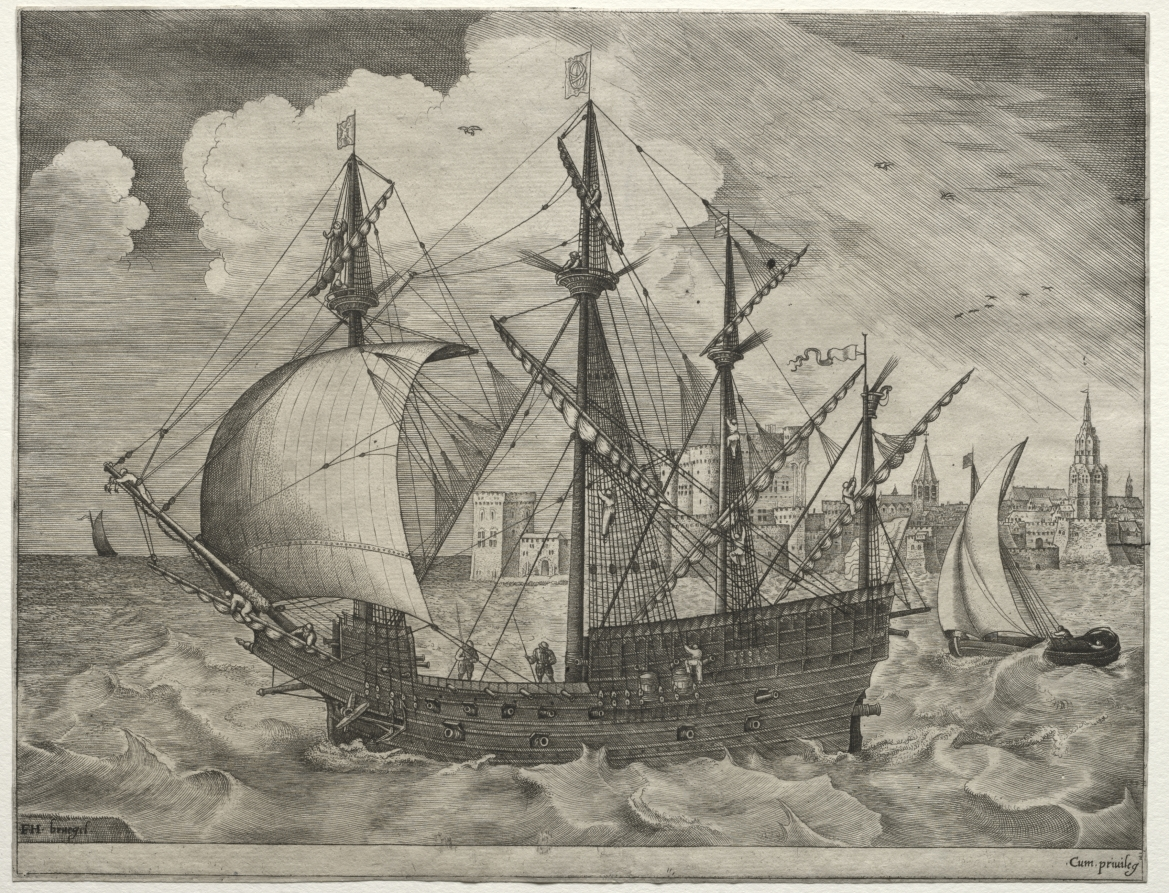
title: Sailing Vessels: Armed Four-Master Putting Out to Sea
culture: Flanders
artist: after Pieter Bruegel (Netherlandish, c. 1525/30–1569)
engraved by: Frans Huys (Flemish, 1522–1562)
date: 1561–65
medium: engraving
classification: Print